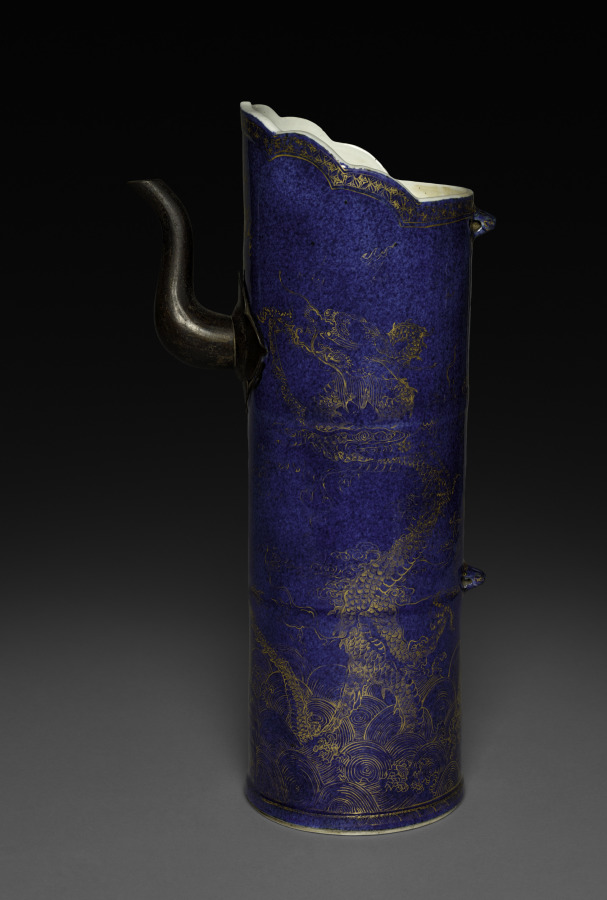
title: Cylindrical Ewer with Dragons Pursuing Flaming Jewel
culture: China, Jiangxi province, Jingdezhen kilns, Qing dynasty (1644-1911), Kangxi reign (1662-1722)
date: 1662–1722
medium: porcelain with powder blue glaze painted with gold decoration and supplied with metal fittings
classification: Ceramic